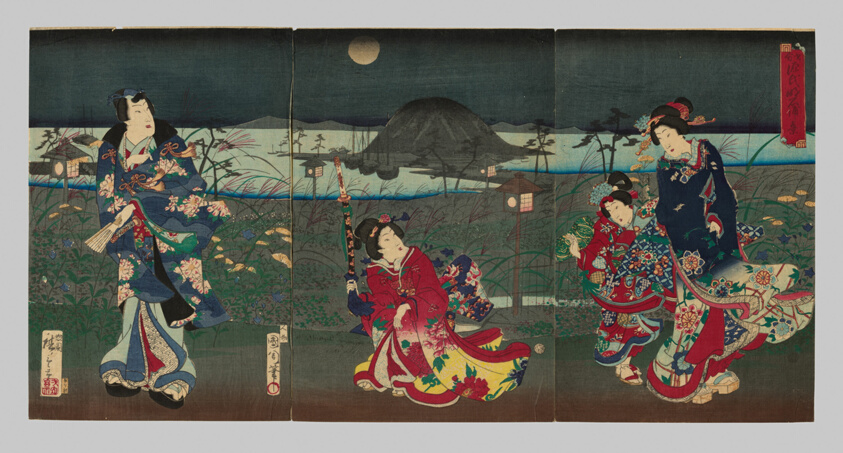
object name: Print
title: Genji Drawn in Different Styles: View of Akashi Bay (Kakiwake Genji, Akashi ura no kei)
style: Japanese (culture or style)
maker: Toyohara Kunichika (Japanese, 1835-1900)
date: 1869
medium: Color woodblock print; oban triptych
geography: Japan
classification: woodblock print; print